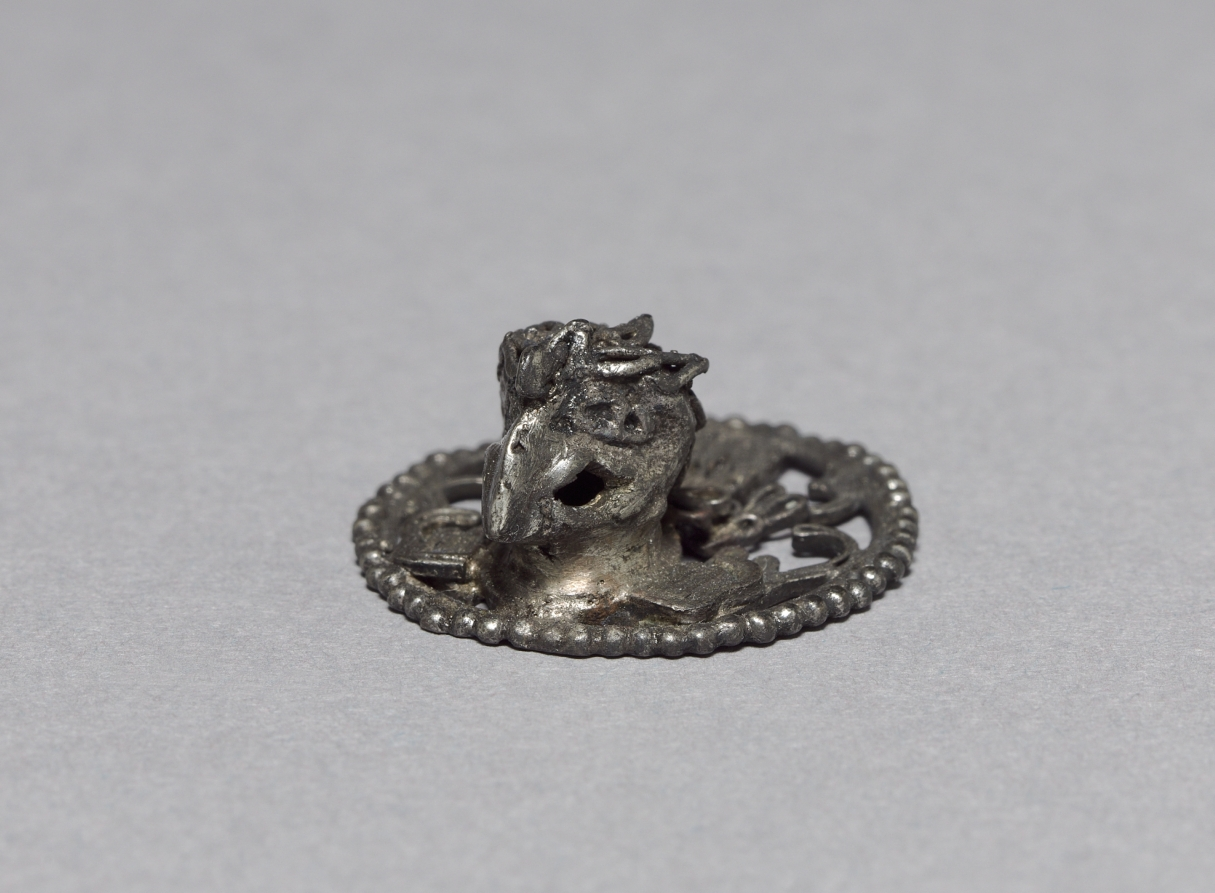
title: Eagle Ornament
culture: Mexican, Oaxaca, Mixtec style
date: c. 1200–1519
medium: silver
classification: Metalwork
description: An additional ornament probably once dangled from the eagle's beak. Similar jewelry has been found in high status Mixtec tombs at Zaachila and at Monte Albán, a Zapotec site controlled by the Mixtec after about AD 750.